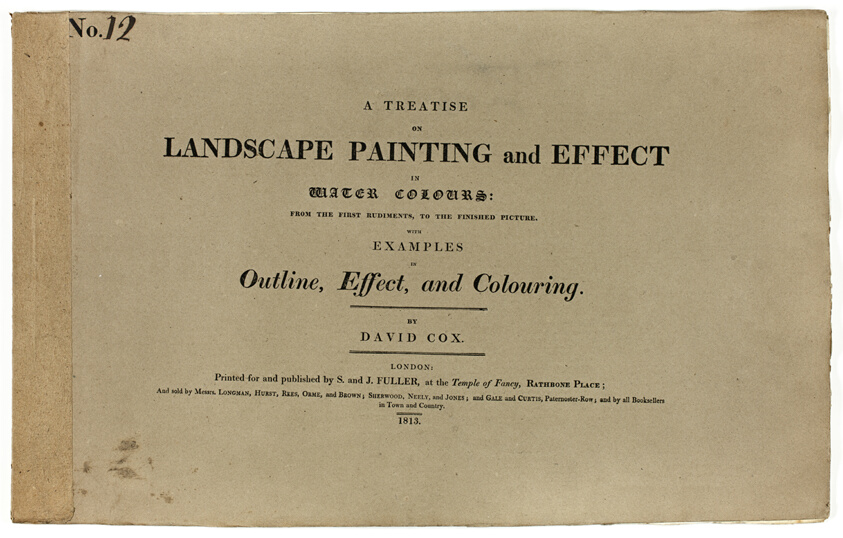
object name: Book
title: A Treatise on Landscape Painting and Effect in Water Colours: From the First Rudiments, to the Finished Picture No. 12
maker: David Cox, the elder (English, 1783-1859); engraved by Richard Reeve (English, 1780-c. 1835); published by S. and J. Fuller (English, 19th century)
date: 1813–14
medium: Book with four color aquatints and letterpress in black on cream wove paper, in box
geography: England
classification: book; paper; prints and drawing